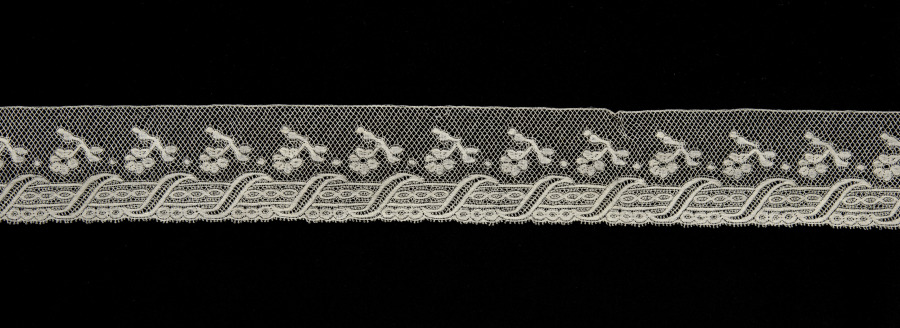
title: Lace Edging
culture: France, Valenciennes or Flanders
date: 1900–1935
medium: Linen: bobbin lace (Valenciennes)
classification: Lace